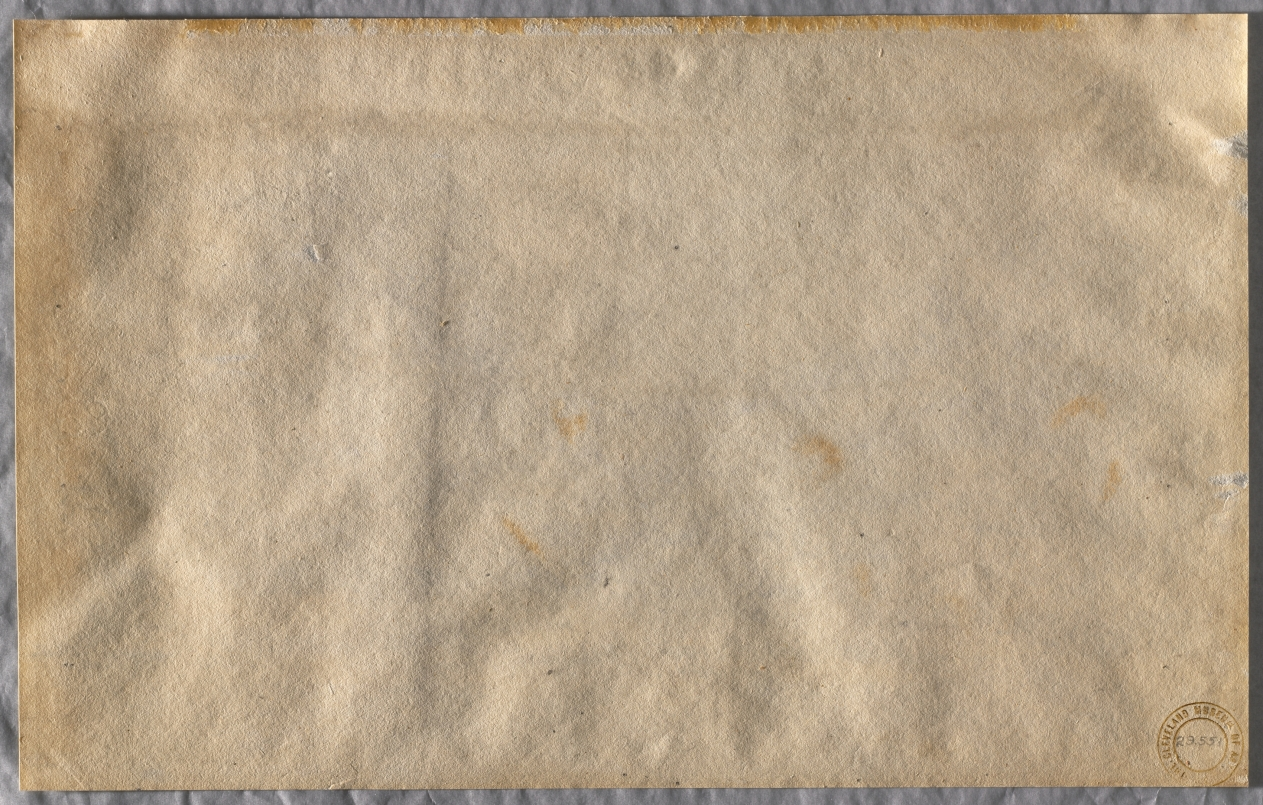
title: Landscape with Trees Surrounding a Pond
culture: England, 19th century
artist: John Constable (British, 1776–1837)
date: c. 1800–37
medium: graphite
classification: Drawing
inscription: Watermark: 1811